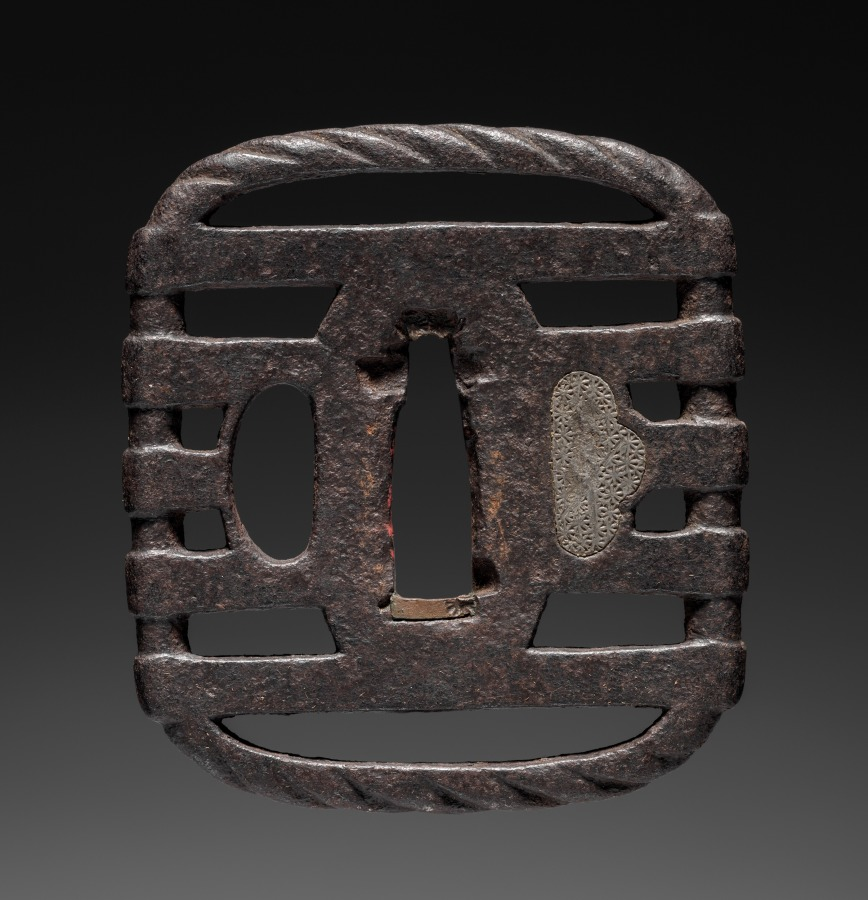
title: Sword Guard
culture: Japan, Edo period (1615–1868)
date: 1615–1868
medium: iron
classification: Arms and Armor